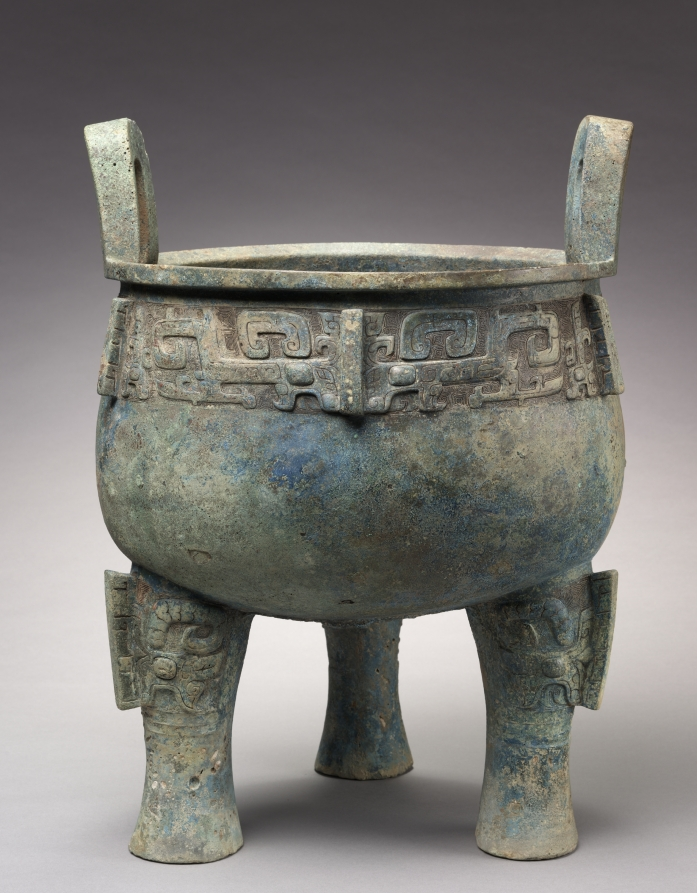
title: Tripod (Ding)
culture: China, Western Zhou dynasty (c. 1046–771 BCE)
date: 1000s BCE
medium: bronze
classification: Metalwork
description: Large and majestic, this tripod gives the effect of overpowering force. Three animal masks (known as taotie) with coiled creatures are aligned in the decorative frieze. With the gaze of the staring eyes, the animal masks assert a religious presence and are meant to instill fear. Bold images of the ram embellish the three legs of the vessel. Bronze cauldrons (ding) like this were made for offerings of food to ancestral spirits in sacrificial and funerary rites performed by the rulers or members of the aristocracy. The ding, in particular, assumed additional significance as the symbol of political power and legitimacy. As signs of status in a stratified society, such highly valued bronzes were cast by its makers with the wish to be "forever treasured for ten thousand years, by sons' sons and grandsons' grandsons."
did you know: Bronze tripods of the ding-type were vessels made in sets of different sizes to be used in rituals, in which grain and meat was offered to the spirits of the ancestors.